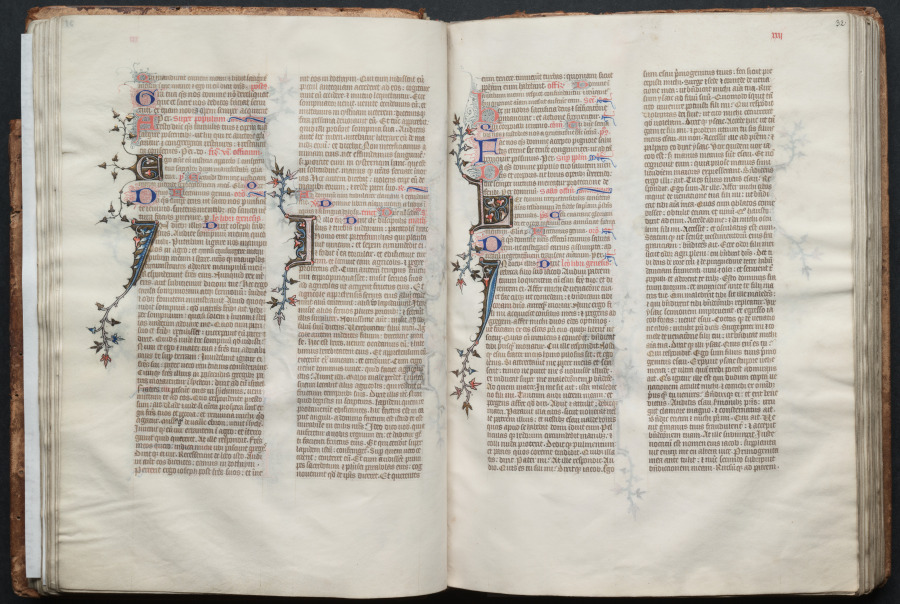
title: The Gotha Missal: Fol. 31v, Text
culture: France, Paris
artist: Master of the Boqueteaux (French)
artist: and Workshop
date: c. 1375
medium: ink, tempera, and gold on vellum; blind-tooled leather binding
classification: Bound Volume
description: The style and quality of this manuscript's decoration is typical of deluxe Parisian books made for aristocratic or royal patrons. Most of the book's decoration appears to be the work of the Master of the Boqueteaux, an artist active at the court of King Charles V (died 1380). His style was apparently shared by a number of book illuminators working in and around Paris. It is very possible that the Gotha Missal belonged to Charles V, but is not provable because the manuscript has no royal portraits and lacks a colophon. Given the book's magnificent decoration, however, it would seem that it was produced for a Valois prince, if not for the king himself. The manuscript receives its name from the German dukes of Gotha, its later owners.